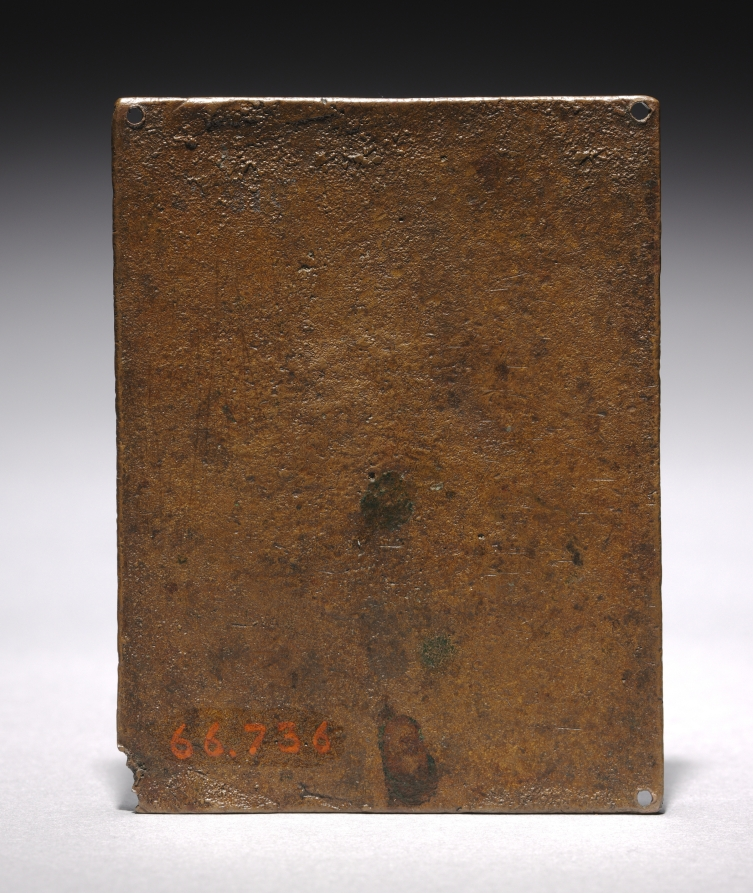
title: The Dead Christ Supported by the Virgin Mary and Saint John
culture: Germany, Ulm, 15th century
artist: Hans Multscher (German, c. 1400–1467)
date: 1427–1467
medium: bronze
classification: Sculpture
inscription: inscribed at base: "ECCE AGNUS DEI" (Behold the Lamb of God).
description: Inscribed on the base are the words ECCE AGNUS DEI (Behold the Lamb of God). Multscher was a prominent and successful sculptor from the Bavaria region who operated a large and prolific workshop with as many as 16 assistants. He worked in many materials and his work reflects a deep knowledge of Flemish realism, particularly that of Claus Sluter.